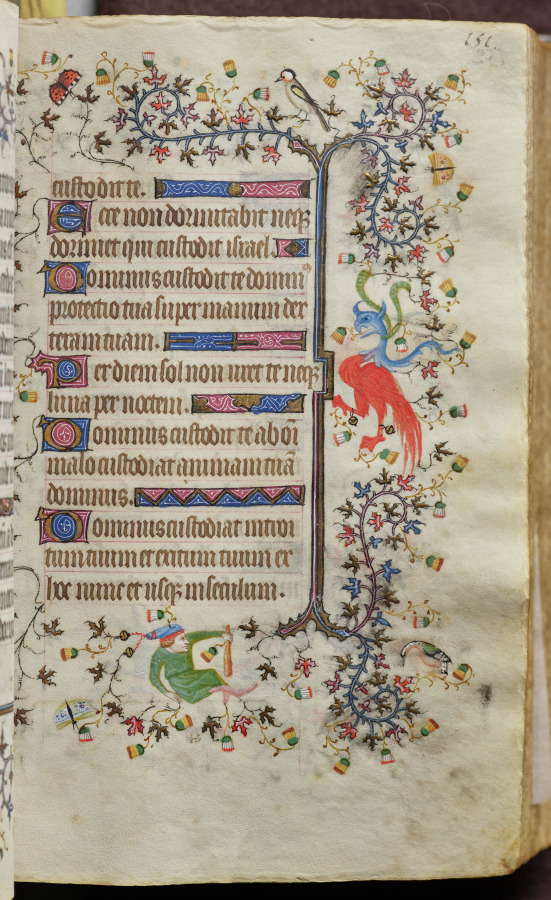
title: Hours of Charles the Noble, King of Navarre (1361-1425): fol. 76r, Text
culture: France, Paris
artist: Master of the Brussels Initials and Associates (French)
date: c. 1405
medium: ink, tempera, and gold on vellum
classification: Bound Volume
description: This precious volume was obviously highly prized by its owner, the French-born King of Navarre, who had his coat of arms painted on no less than twenty folios. Rather than directly commissioning this manuscript from a specific workshop, it seems that Charles the Noble acquired his book of hours -- perhaps ready-made for the luxury market -- while on a trip to Paris in 1404-05. A collaborative effort, six painting styles are evidenced within the pages of this codex, those of two Italians, two Frenchmen, and two Netherlanders. The painter who was responsible for the planning and decoration of the book, and who produced seventeen of the large miniatures, was a Bolognese artist known as the Master of the Brussels Initials. His principal assistant, responsible for most of the borders, was a Florentine who signed his name "Zecho" da Firenze on folio 208 verso.